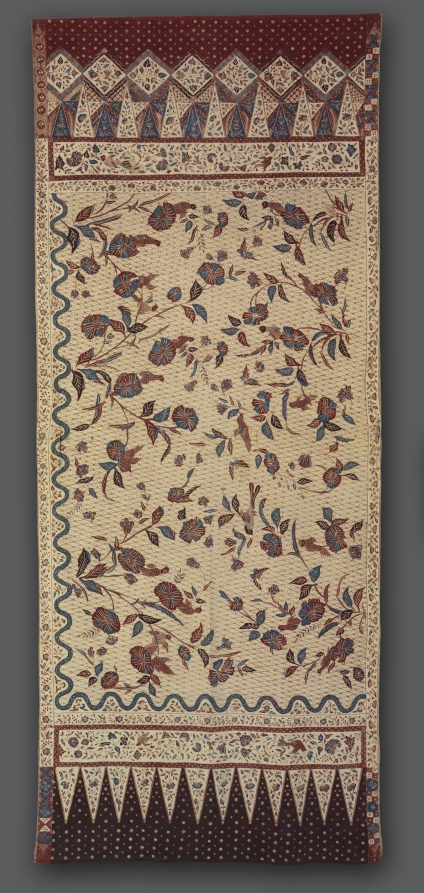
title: Sarong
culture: Indonesia, Java, early 20th century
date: early 1900s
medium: plain weave cotton; resist dyed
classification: Textile